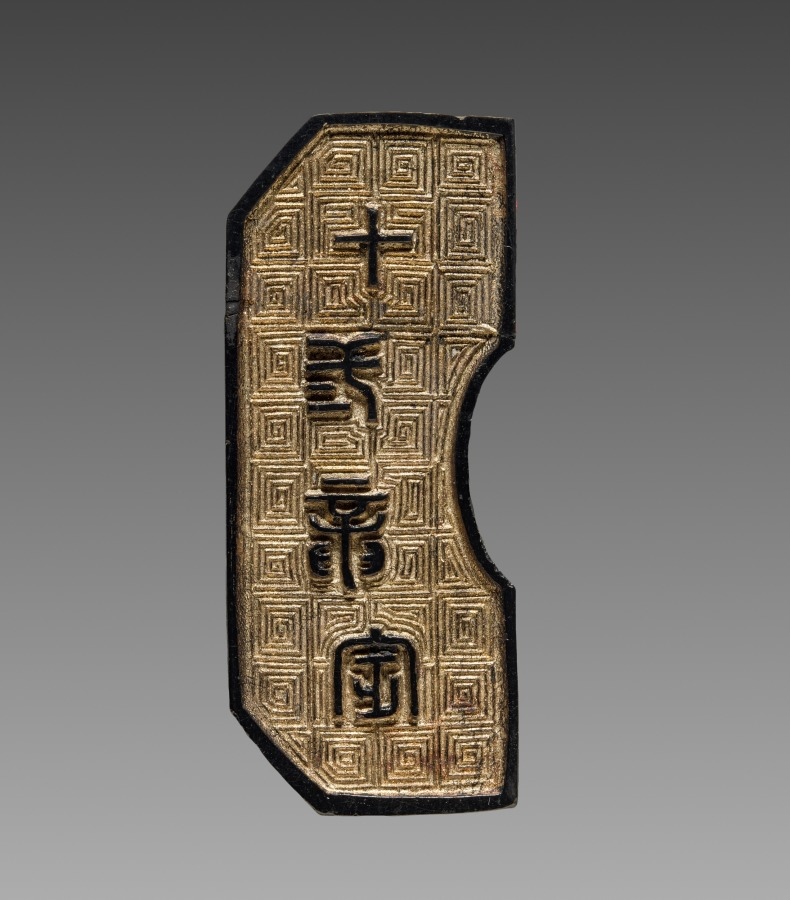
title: Ink Cake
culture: China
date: 1800s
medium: ink cake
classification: Miscellaneous